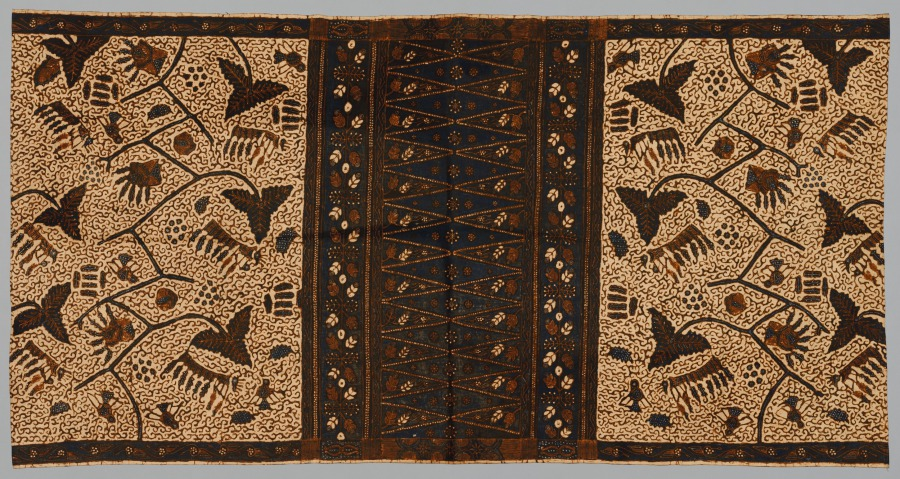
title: Wearing Cloth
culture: Indonesia, Java, 19th century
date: 1800s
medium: batik; cotton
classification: Textile